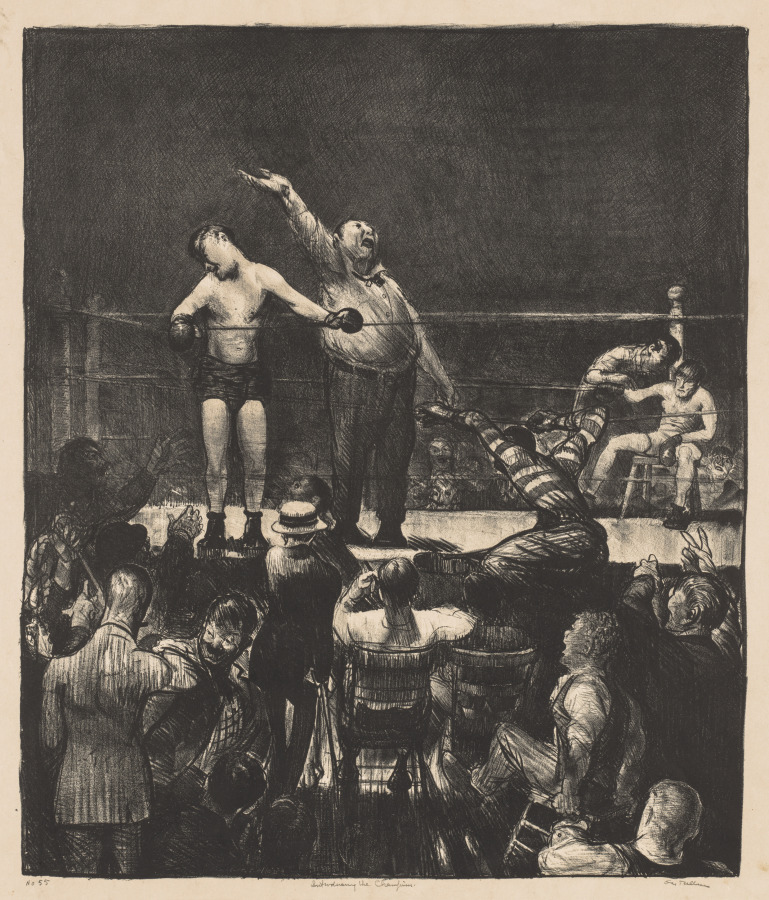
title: Introducing the Champion, No. 1, Large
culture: America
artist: George Bellows (American, 1882–1925)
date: 1916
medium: lithograph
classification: Print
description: Due to the popularity of his early boxing paintings such as Stag at Sharkey’s, Bellows was often commissioned by newspapers and magazines to depict sporting events, both actual and fictional. One of the artist’s first boxing prints, Introducing the Champion was inspired by a drawing he made three years earlier to illustrate a short story in American Magazine, which describes an imagined lightweight champion nicknamed Tornado Black. The cocky gloating of this character, who panders to the crowd, provides the impetus for Bellows’s rendering.